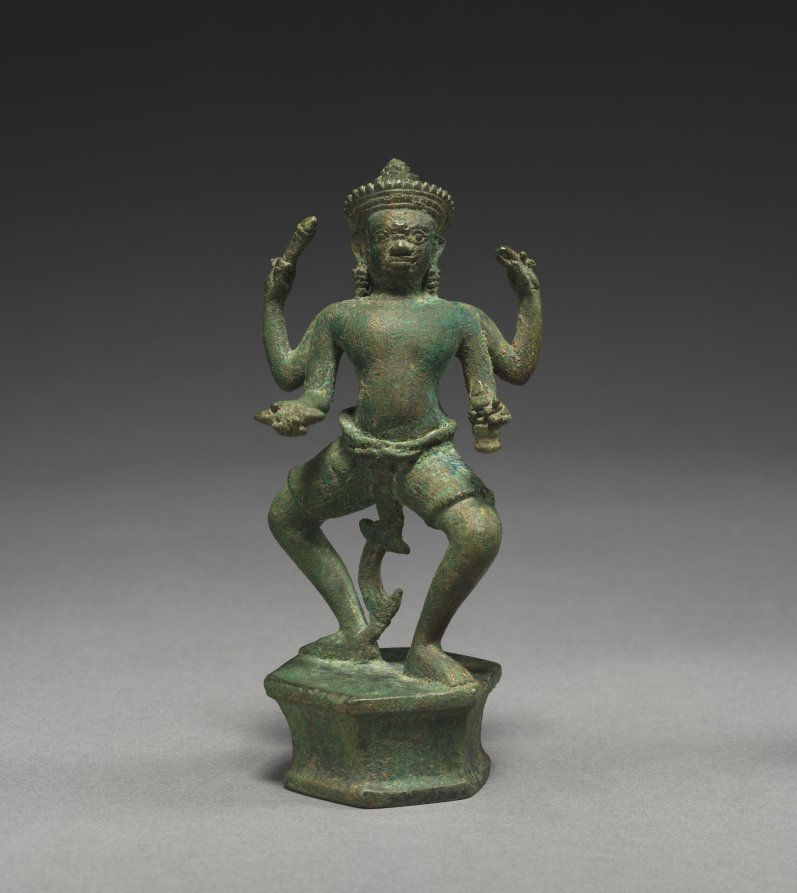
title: Four-Armed Standing Tantric Male Divinity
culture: Cambodia, Koh Ker/Khleang style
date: 925–75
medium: bronze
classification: Sculpture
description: In his four hands, the male tantric deity holds a noose, bell, vajra, and club.